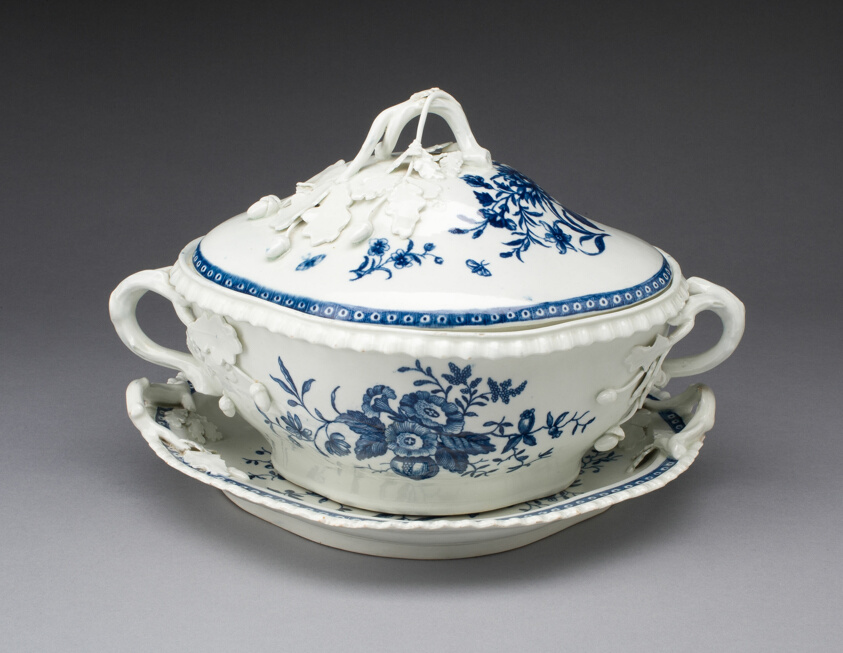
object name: Ceramics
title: Tureen and Stand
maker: Worcester Porcelain Factory (Warmstry House Period, 1751–1783); Worcester, England, founded 1751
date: c. 1770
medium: Soft-paste porcelain, underglaze blue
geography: Worcester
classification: porcelain; european decorative arts; ceramics